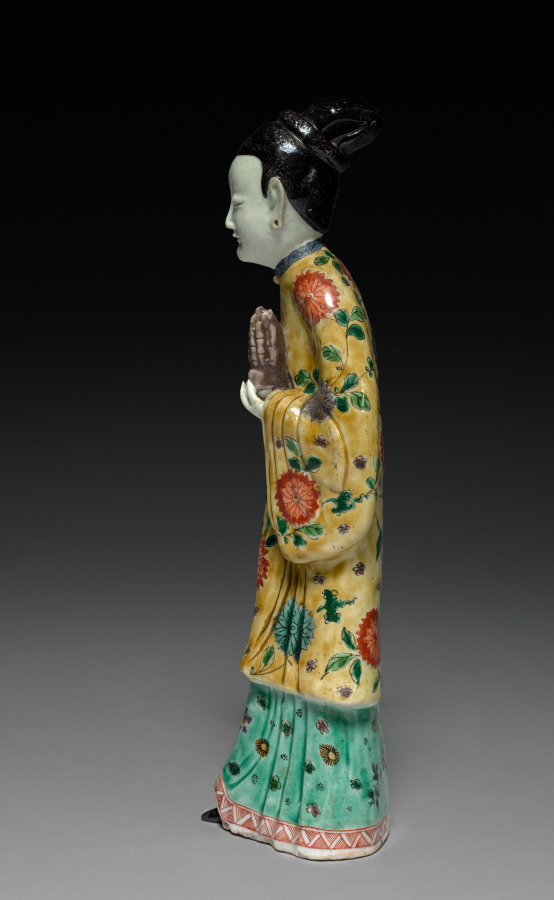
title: Court Lady Holding a Sheng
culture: China, Jiangxi province, Jingdezhen kilns, Qing dynasty (1644-1911), Kangxi reign (1662-1722)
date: 1662–1722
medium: porcelain with famille verte overglaze enamel decoration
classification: Ceramic